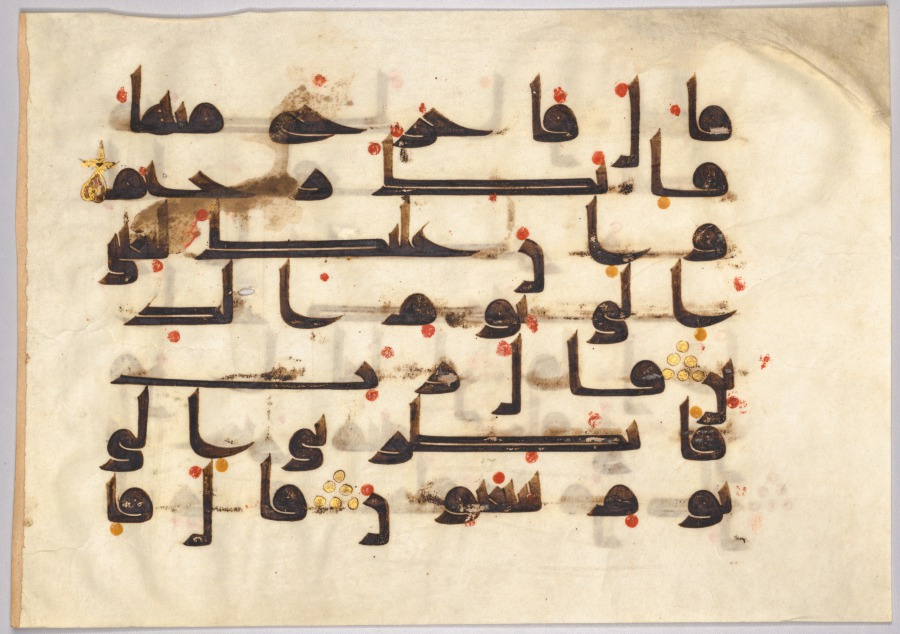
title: Folio from a Qur'an (verso)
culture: Probably Egypt, Abbasid period (750–1258)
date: 800s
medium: Opaque watercolor, ink, and gold on parchment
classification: Drawing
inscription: Sura al-Saad (38: part 77-80). Script: Kufi (seven lines to a page)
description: The sacred book of Islam, the Qur'an is believed by Muslims to be a literal transcription of the word of God, spoken in Arabic to the Prophet Muhammad (died 632). In order to convey the importance of the divine word, Arabic calligraphy—sometimes highly elaborate and embellished with gold—was used to create copies of the Qur'an. This folio was written in the oldest style of Arabic calligraphy, called Kufic script, used in earliest surviving copies of the Qur'an. The wide format of the page is well suited to this style of Kufic that has elongated, horizontal strokes. Vowels are indicated by red dots, and the triangles of gold dots mark the end of each verse. The text on the recto recounts an argument between God and Lucifer. Proud Lucifer declares himself superior to humans because he was formed from fire, while humans were molded from clay. In the verses on the verso, God casts Lucifer out of heaven as punishment for his pride.